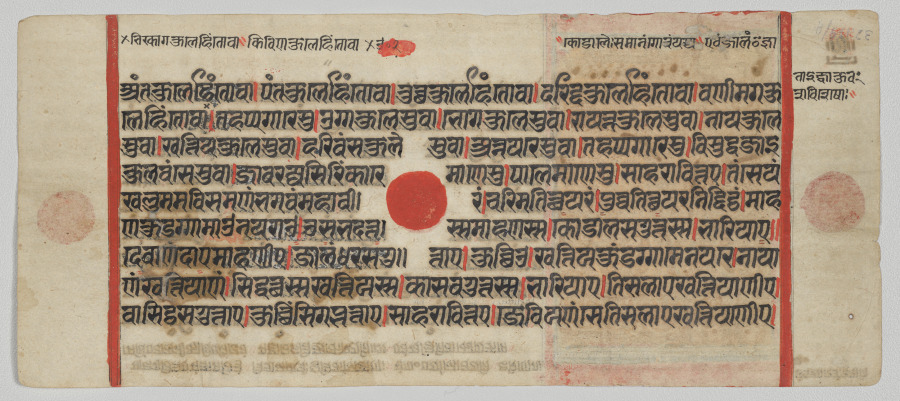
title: Text, Folio 9 (recto), from a Kalpa-sutra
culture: Western India, Gujarat, last quarter of the 15th century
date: c. 1475–1500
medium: Gum tempera, ink, and gold on paper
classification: Painting